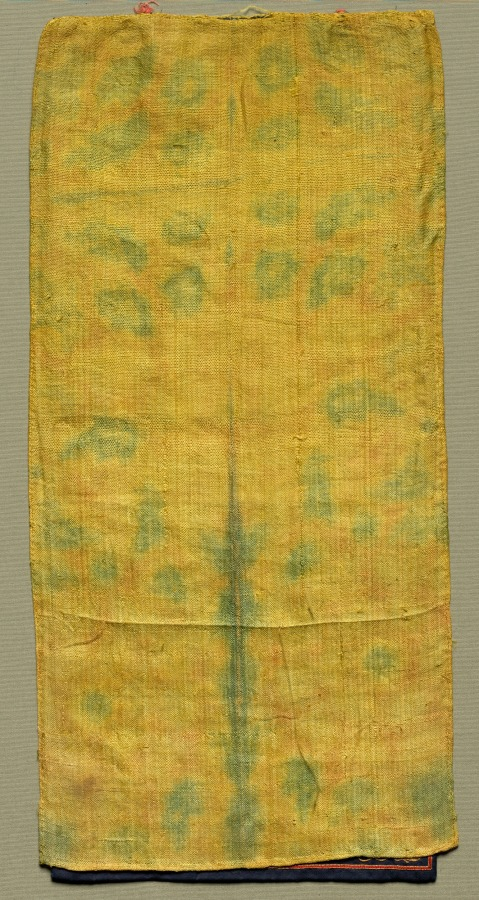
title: Thangka with the Seventh Bodhisattva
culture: China, Ming dynasty (1368–1644)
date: 1368–1424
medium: Silk and gold thread on silk satin ground, embroidery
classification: Embroidery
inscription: Penned on the reverse is a Tibetan inscription that translates as "the Seventh Bodhisattva."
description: In remarkably pristine condition, this embroidery is from a dispersed set that included images of protectors and bodhisattvas. The embroidery technique and pictorial style are Chinese, but the subject matter and the type of devotional hanging called a thangka are associated with Tibetan Buddhism. Historical records state that during the early Ming dynasty (1368–1644), gifts of Buddhist art were sent from China to Tibet, since relationships between Chinese rulers and Tibetan monastic patriarchs were strong and amicable during this time. A Tibetan inscription on the back notes that this figure is the “seventh bodhisattva,” indicating the position in which it would have hung in a temple hall. Odd-numbered works were hung on one side of the main image, and even-numbered works on the other, counting from the center.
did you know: The bodhisattva is flanked by two columns, each topped with a makara, a fanciful water creature whose tail becomes lotus scrolls forming an arch over the bodhisattva.